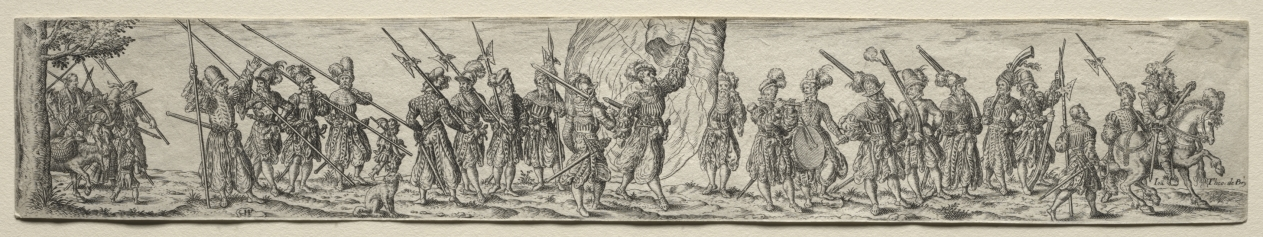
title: Marching Soldiers, in the Center a Standard Bearer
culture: Flanders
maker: Johann Theodor de Bry (German, 1561–1623)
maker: after Jost Amman (Swiss, 1539-1591)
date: 1584–1623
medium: engraving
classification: Print